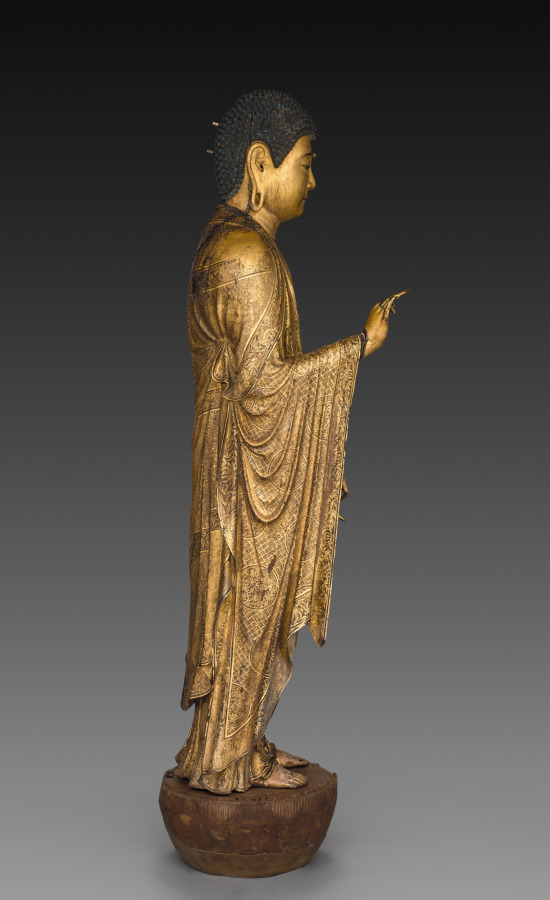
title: Buddha of Infinite Life and Light (Amida Nyorai)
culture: Japan, Kamakura period (1185–1333)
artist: Kōshun (Japanese, active mid-1200s)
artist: assisted by Koshin (Japanese, active mid-1200s)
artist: assisted by Joshun (Japanese, active mid-1200s)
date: 1269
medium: Cypress with lacquer, color, gold, cut gold, rock-crystal inlaid eyes, and quartz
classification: Sculpture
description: This ornate Buddha Amida stands in a posture of welcome, greeting the dying who will accompany him back to his Pure Land. Documents inserted into the sculpture’s hollow core around the time of its creation include a copy of the sacred text Amida Sutra, a register of donors who desired to be joined together in generating karmic merit (kechien) through the creation and dedication of the sculpture, and a record asserting that the image was completed over the course of 33 days in 1269 at Shitennōji Temple in Osaka.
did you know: The lead sculptor was Kōshun, who had been granted the lofty title “Bridge of the Law.”